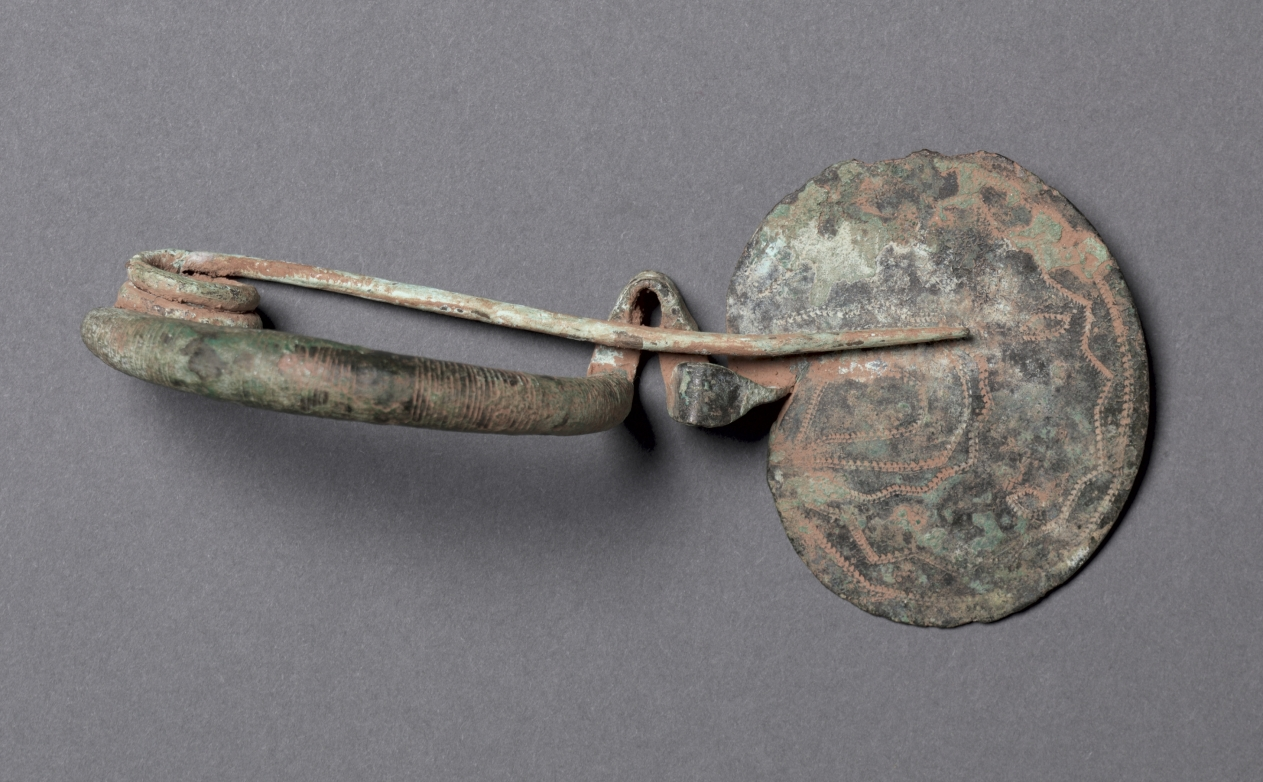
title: Plate Fibula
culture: Italy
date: 900–700 BCE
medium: bronze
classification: Jewelry